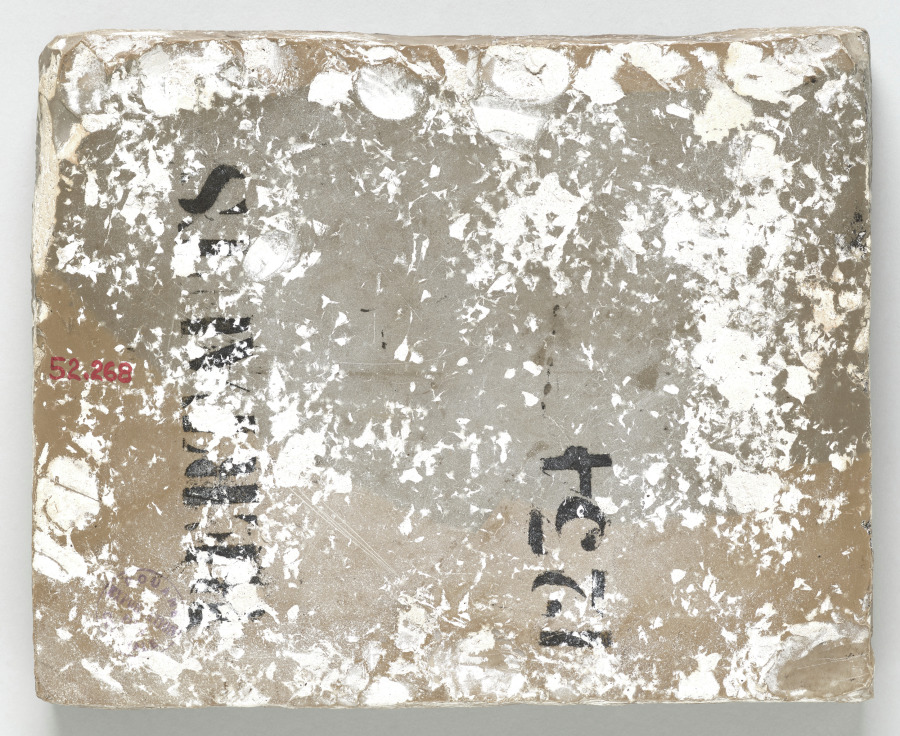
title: Lion Devouring a Horse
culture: France, 19th century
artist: Eugène Delacroix (French, 1798–1863)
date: 1844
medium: uncanceled lithographic stone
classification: Lithographic Stone